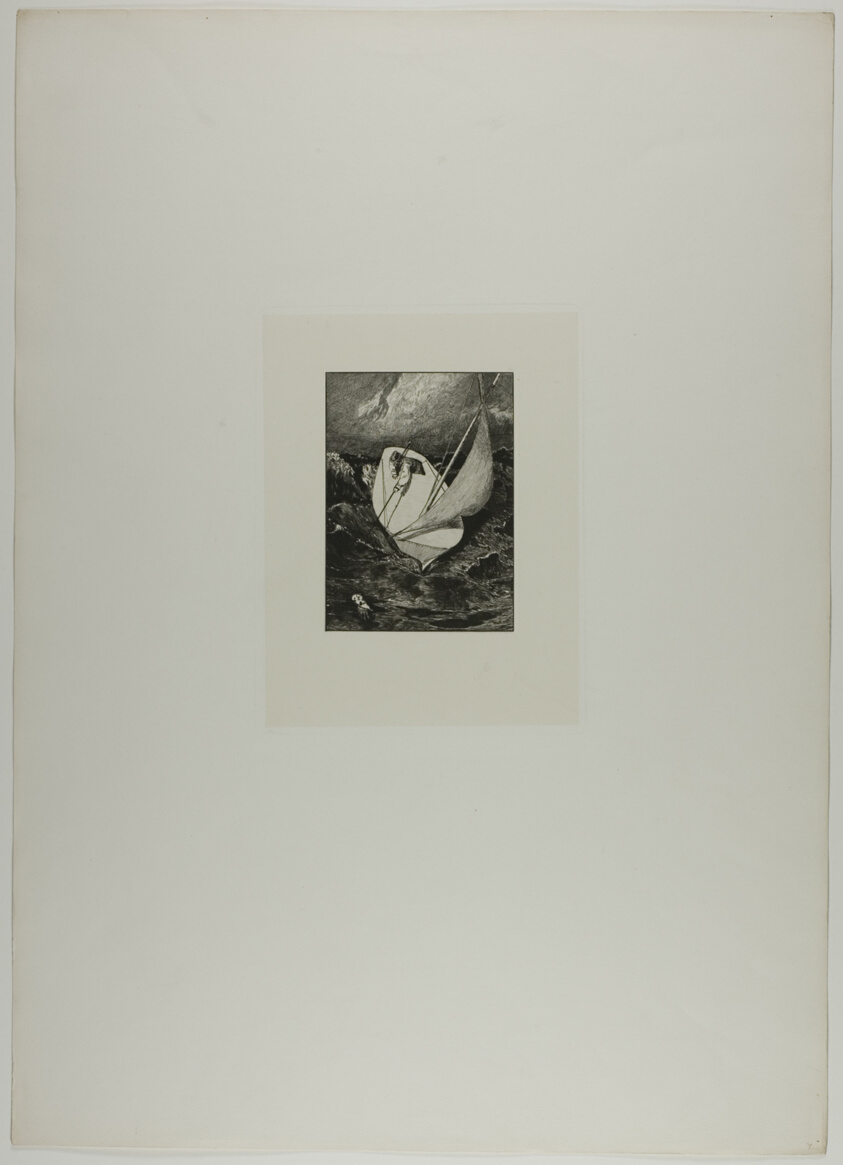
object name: Print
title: Rescue, plate four from A Glove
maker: Max Klinger (German, 1857-1920)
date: 1881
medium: Etching on ivory chine collé on off-white wove paper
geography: Germany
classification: etching; print; prints and drawing